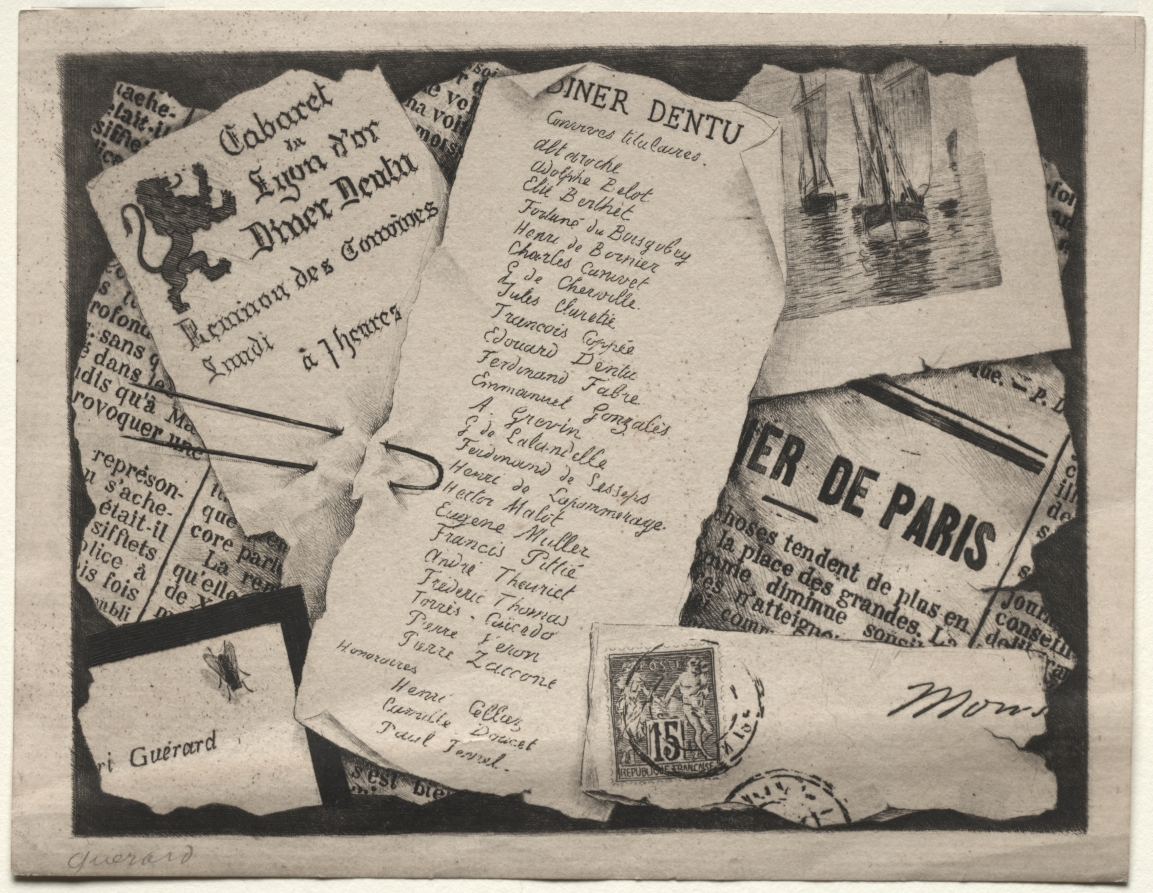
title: Dinner Invitation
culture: France, 19th century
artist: Henri Charles Guérard (French, 1846–1897)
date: c. 1882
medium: etching and aquatint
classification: Print